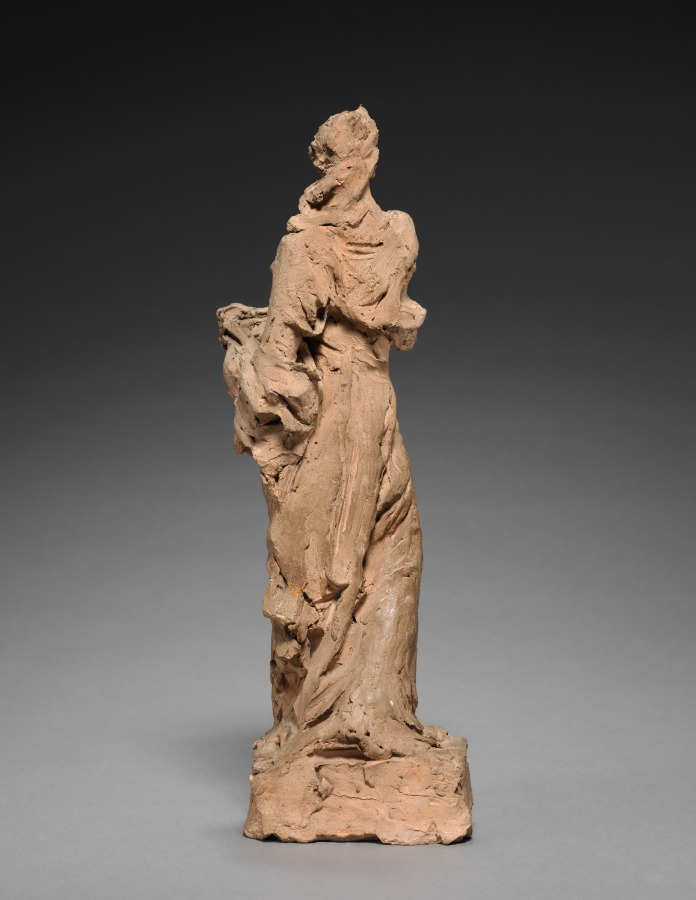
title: Judith with the Head of Holofernes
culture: France, 19th century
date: mid-1800s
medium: terracotta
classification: Sculpture